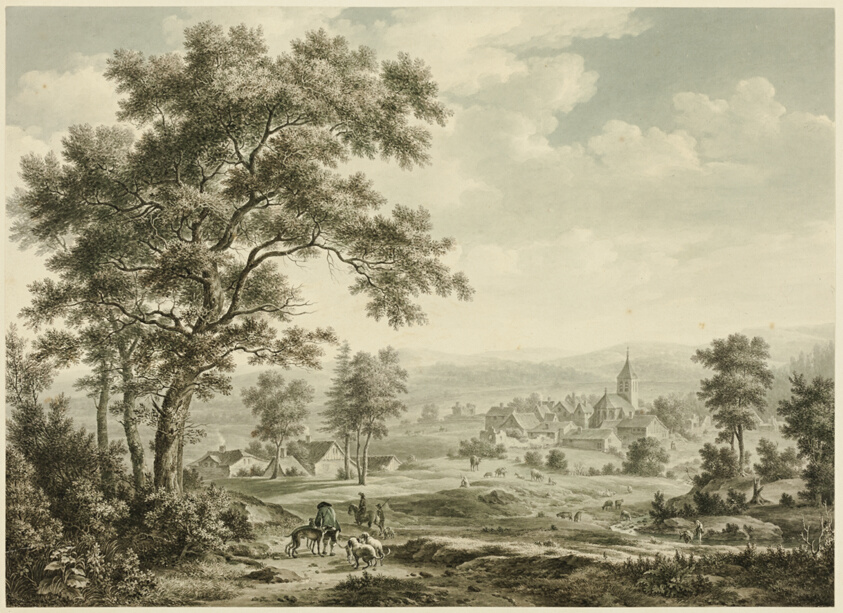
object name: Drawing and Watercolor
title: View of Village and Distant Hills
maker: Unknown French artist; after Johan van der Hagen (Dutch, 1676-c. 1745)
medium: Watercolor on ivory wove paper, laid down on ivory board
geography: France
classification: watercolor; drawings (visual works); prints and drawing